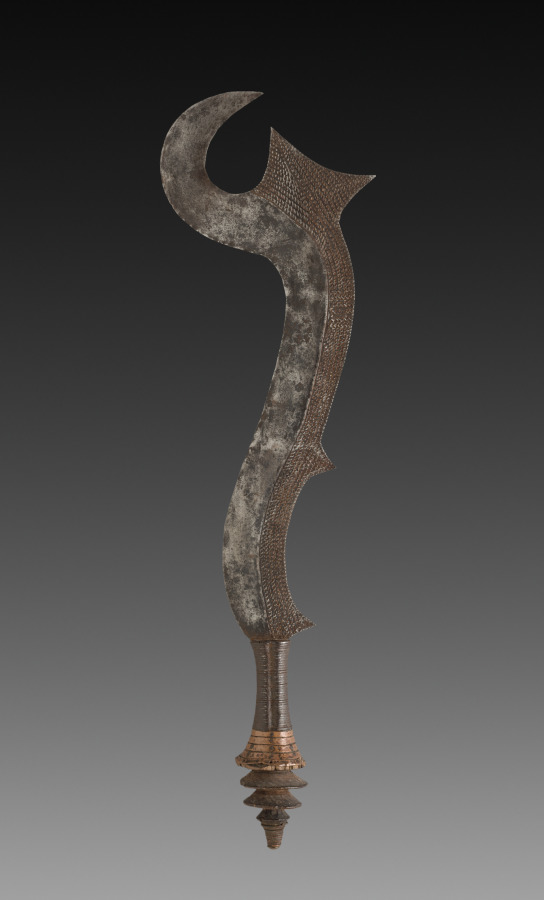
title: Ceremonial Sword (ngulu)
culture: Africa, Central Africa, Democratic Republic of Congo, Ngombe-style, Doko-style, or Iboko-style maker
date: 1800s–1900s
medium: Iron alloy, wood, copper alloy, and pigment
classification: Arms and Armor